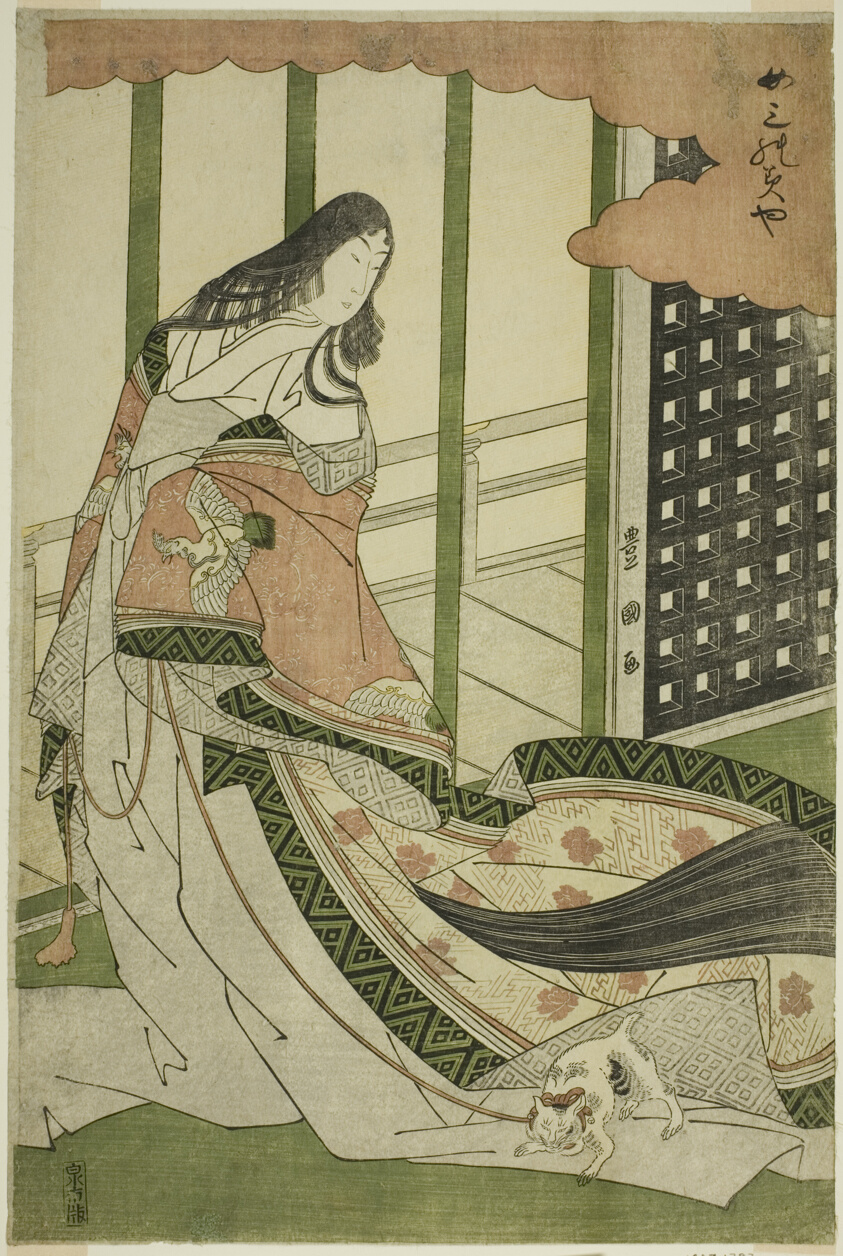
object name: Print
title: The Third Princess (Nyosan no miya)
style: Japanese (culture or style)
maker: Utagawa Toyokuni I 初代 歌川 豊国; Japanese, 1769–1825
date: c. 1792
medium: Color woodblock print; oban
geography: Japan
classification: woodblock print; print; asian art